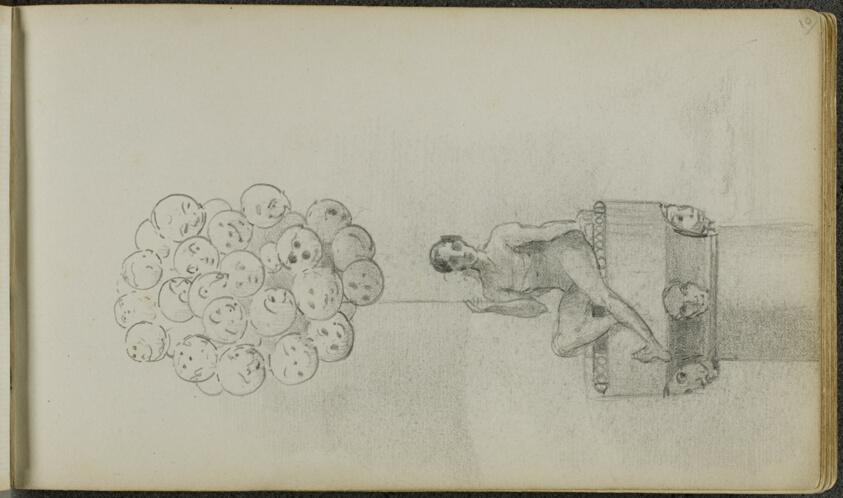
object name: Book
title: Sketchbook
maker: Odilon Redon (French, 1840-1916)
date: c. 1879–85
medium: 55-page sketch book of drawings in pencil on cream wove (with a few buff and blue) paper, with (simulated) laid paper interleaves, bound in black cardboard with black fabric taping on spine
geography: France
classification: sketchbook; graphite; prints and drawing; book; paper